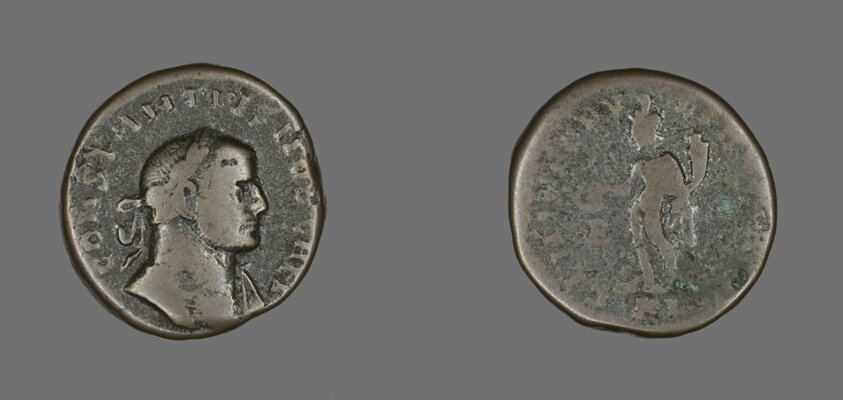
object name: Coin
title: Coin Portraying Emperor Constantius I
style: roman (ancient, style or period), ancient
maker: Roman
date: 293-306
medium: Bronze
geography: Roman Empire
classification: coin; ancient art